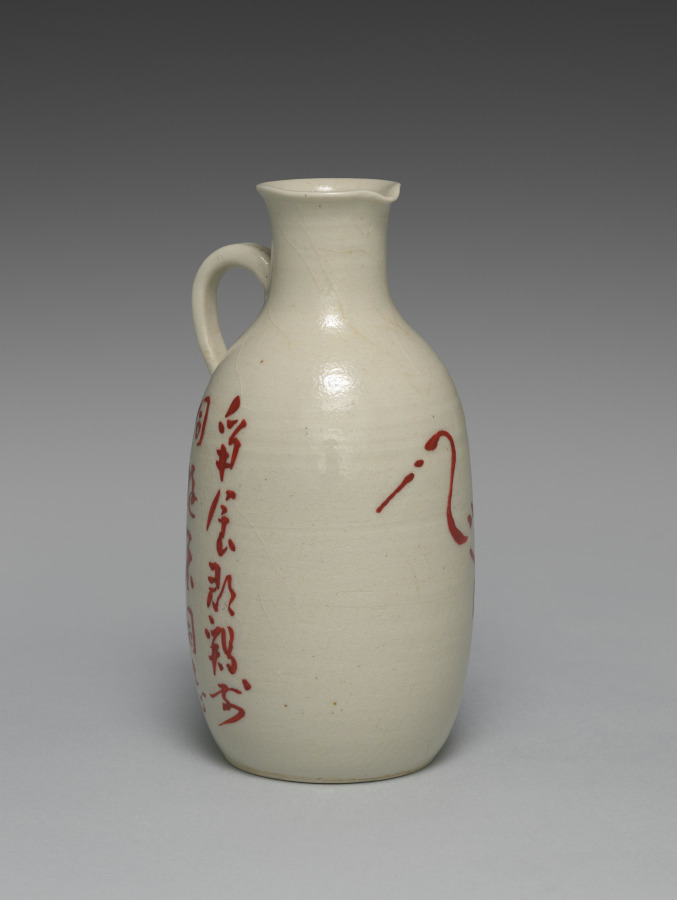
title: Crane Sake Pourer from Sake Pourers with Crane and Tortoises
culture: Japan, Meiji period (1868–1912)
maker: Seifū Yohei III (Japanese, 1851–1914)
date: 1893–1914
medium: One of a pair of sake flasks; porcelain with overglaze color enamel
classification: Ceramic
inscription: 爭食羣雞前，同遊者同志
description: This flask has a crane with a leg raised, while the other flask of this pair has stencil-like paintings of three turtles—a young one with its parents. Cranes and turtles are well-recognized symbols of longevity in East Asia, with the turtle said to live for ten thousand years and the crane for one thousand. Each flask also has a poem on the back, one in Chinese and the other in Japanese. The Chinese poem on this crane flask is two nonconsecutive five-character lines from a poem called “Crane Feelings” by the famous Tang dynasty poet Bai Juyi (772–846). One character in one of the lines has been altered. This creative poetic sampling results in a verse reading zheng shi qun ji qian, tong you zhe tong zhi 爭食羣雞前，同遊者同志. It could perhaps be translated, “before the flock of chickens competing for food, those traveling together have the same ambitions.”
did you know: This pair of seemingly humble sake pourers celebrate longevity and delight in a literary tradition that embraces multiple forms of poetic expression.